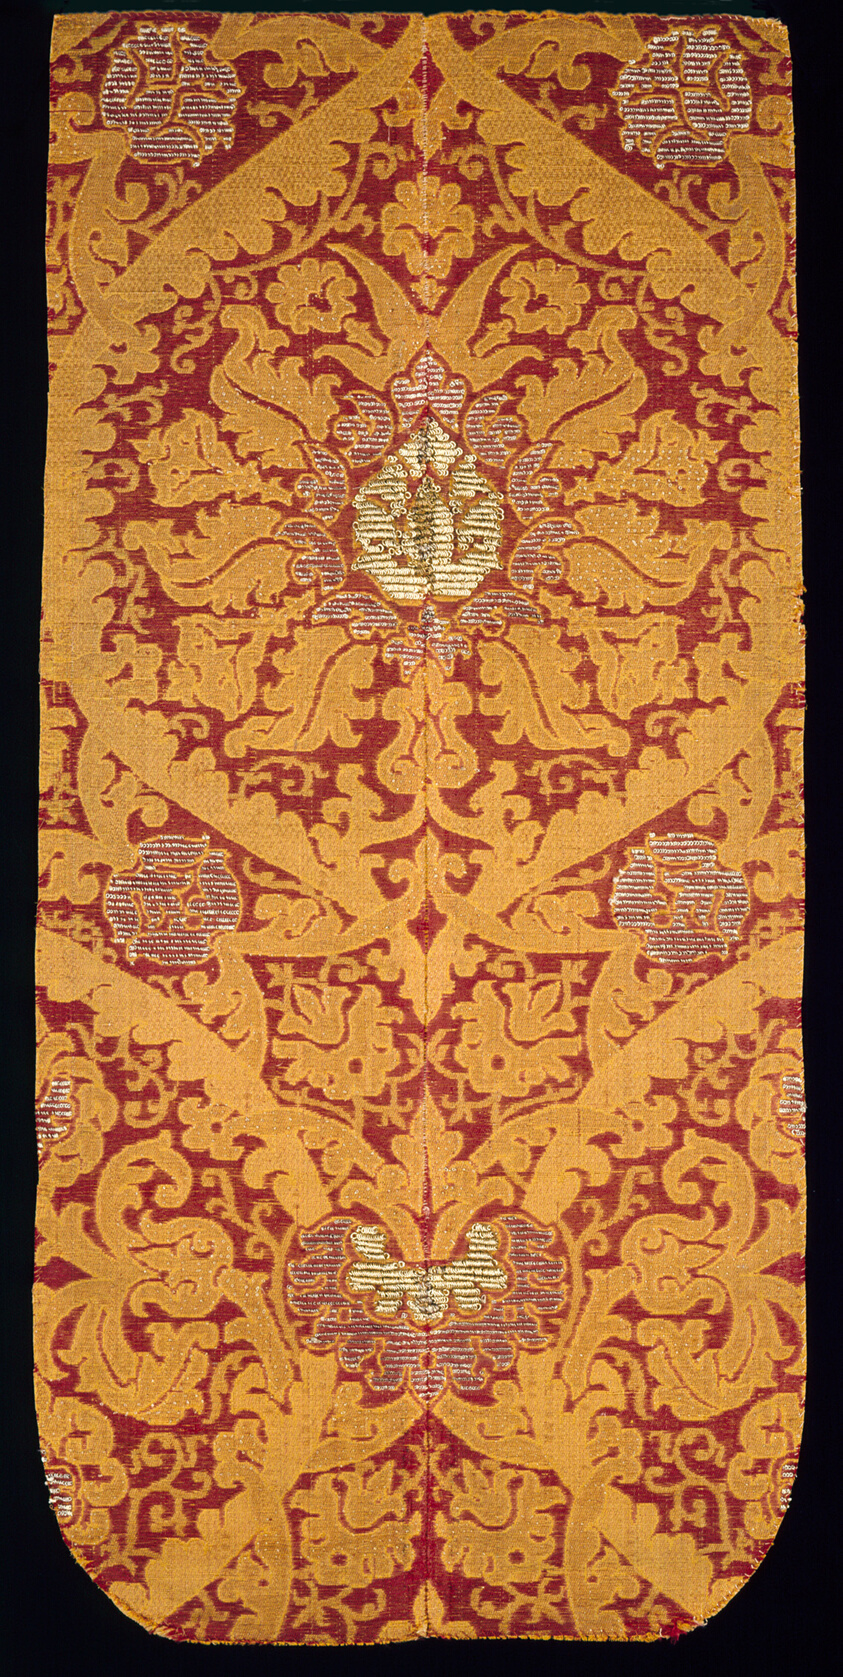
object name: Textile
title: Chasuble (Back Only)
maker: Italy or Spain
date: 16th century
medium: Silk and gilt- and silvered-metal-strip-wrapped silk, warp-float faced 2:1 twill weave with gilt-metal wire supplementary patterning wefts bound by secondary binding warps in twill interlacings and supplementary patterning and brocading wefts forming weft loop pileSilk and gilt- and silvered-metal-strip-wrapped silk, twill weave with gilt-metal wire supplementary patterning wefts bound by secondary binding warps in twill interlacings and supplementary patterning and brocading wefts forming weft loop pileSilk and gilt- and silvered-metal-strip-wrapped silk, twill weave with gilt-metal wire supplementary patterning wefts bound by secondary binding warps in twill interlacings and supplementary patterning and brocading wefts forming weft loop pile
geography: Italy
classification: textile; weaving; liturgical